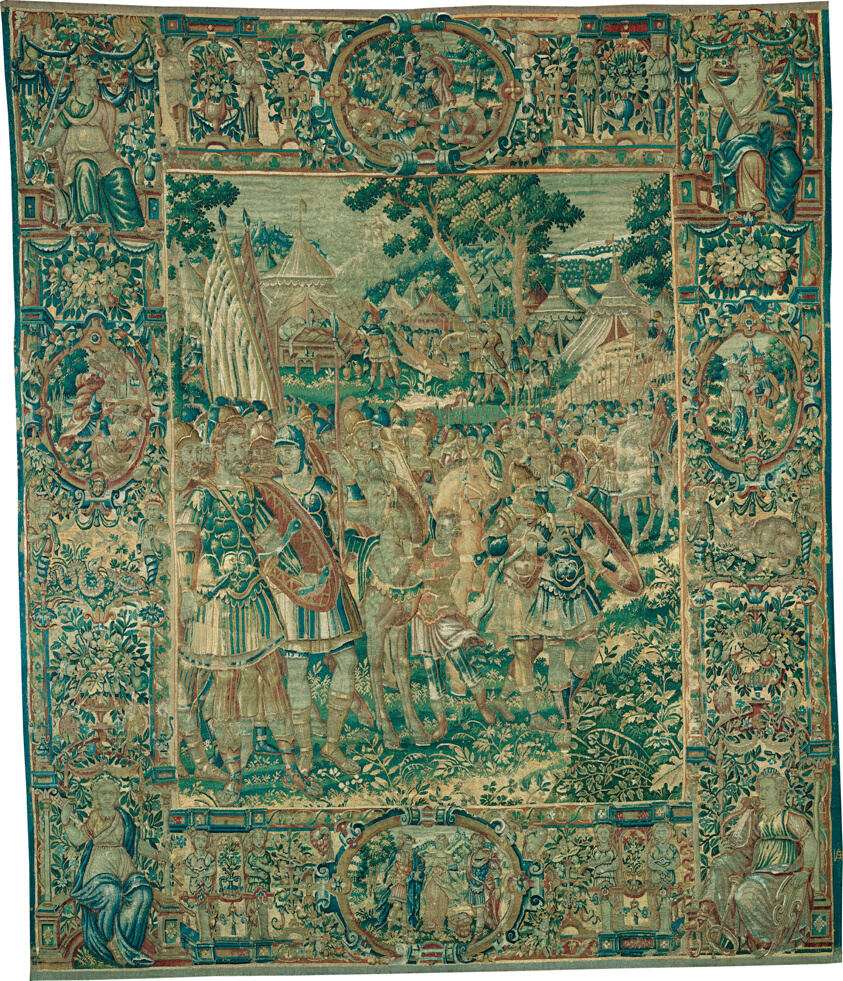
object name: Textile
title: Alexander Kneeling before Jaddus at the Gates of Jerusalem [left section], from The Story of Alexander the Great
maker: Adapted from designs attributed to Nicolaas van Orley (died 1586/91); Possibly woven at the workshop of Jacques Tseraerts (died before 1613); Flanders, Brussels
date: c. 1600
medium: Wool and silk, slit, dovetailed and double interlocking tapestry weave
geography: Flanders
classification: weaving - tapestry; textile